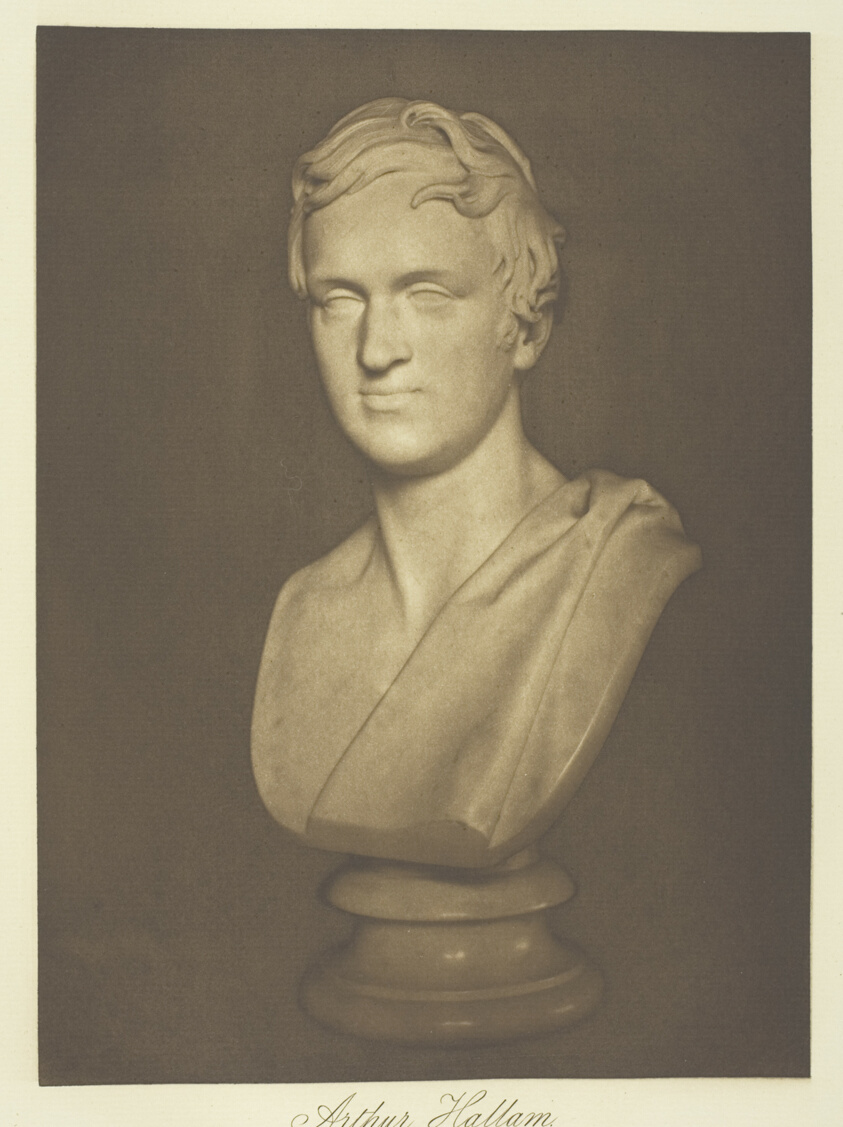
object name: Photograph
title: Arthur Hallam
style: 19th century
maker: Henry Herschel Hay Cameron (English, 1852–1911)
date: c. 1893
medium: Photogravure, plate 6 from the album "Lord Tennyson and his Friends" (1893)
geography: England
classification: photogravure; photomechanical process; photography; photograph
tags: Collected by Hugh Edwards, Lord Tennyson and His Friends